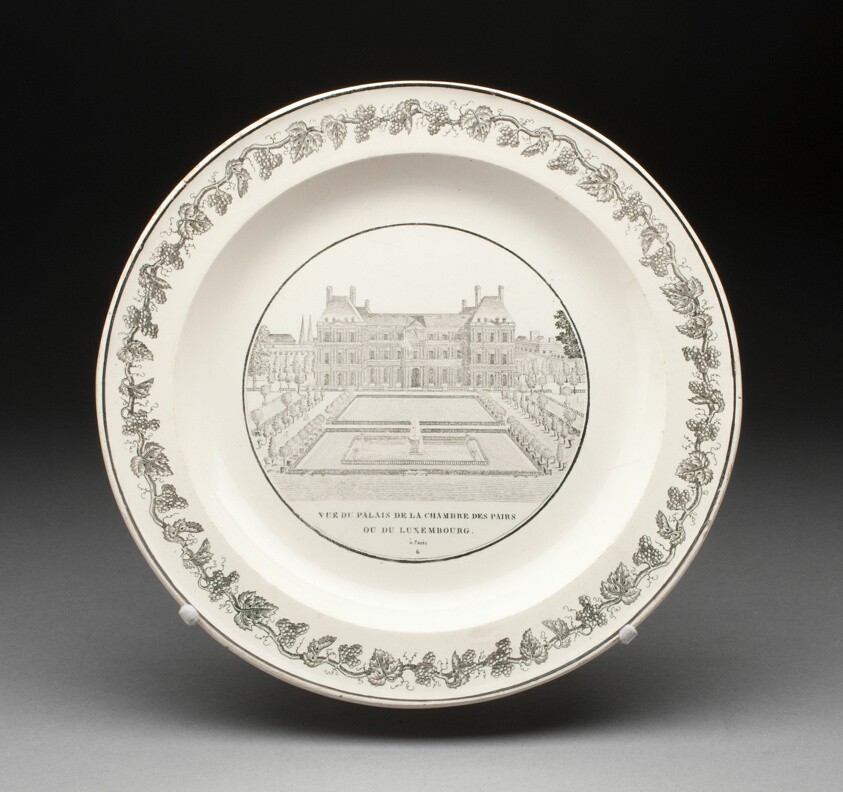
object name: Ceramics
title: Plate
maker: Creil Pottery (French, 1801-1840)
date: 1800/50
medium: Earthenware, transfer-printed (creamware)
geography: Creil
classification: plate (general, dish); earthenware; dish (vessel); european decorative arts; ceramics; creamware